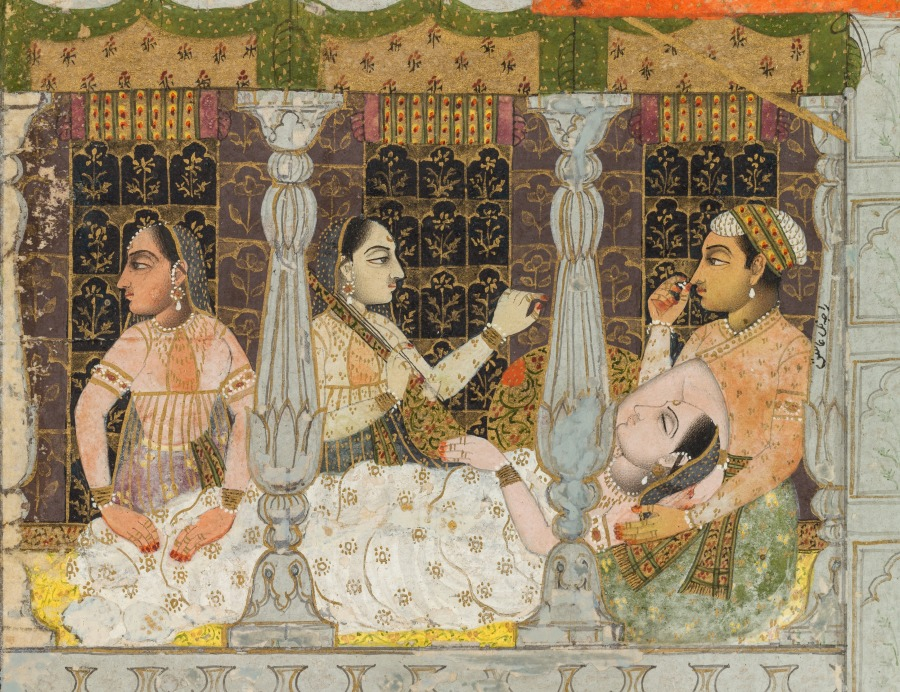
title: Lovers and beloveds: A composite of scenes from Persian, Urdu, and Sanskrit literature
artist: Chitarman II (Indian, c. 1680–с. 1750)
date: c. 1735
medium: Gum tempera and gold on paper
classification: Painting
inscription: Persian inscriptions throughout, in nasta‘liq script: Top left: The celebrated lover Ranjha; Top right, above awning: The notable ladies of the city falling into a swoon having caught sight of Joseph’s beauteous countenance; Top center, on pillar beneath canopy: The celebrated lover Vamiq; On another pillar, behind the woman’s head: The celebrated beloved ‘Azra; Upper left, on pillar: King Nala, the lover; Central figure with halo: The coming from the prison and sitting [in state] of the Lord Joseph the Prophet, with the women of the town cutting the palms of their hands and falling down unconscious; Left of center: [. . . cutting palms . . . wine cups fell from their hands . . . state of wonderment . . .]; Central pavilion at left: Sassi, the beloved the lover [Punnun]; Below central figure of Joseph: The stream of milk Shirin the beloved, weeping The death of Farhad, the lover; Lower right, in front of bearded man: Hafiz of Shiraz; Below his decanter: The stick of candy [referring to the woman with whom, according to popular lore, Hafiz was supposed to have fallen in love as a youth]; Behind the pavilion at right: Bride descending into a grave . . .; On the white railing to the left: Khwaja Bu Ali . . .; Bottom left: Queen Padmavati, the beloved, King Ratnasena, the lover; Bottom right: Majnun, the lover; On page held by Majnun: Say, “He is Allah, who is One, Allah the eternal refuge. He neither begets nor is born, Nor is there to Him any equivalent.” [Qur'an, chapter 112]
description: The figure of Joseph, identified by his halo, sits in the center near the top of this painting of heroes and heroines of ten different Persian, Urdu, and Sanskrit romances. The depicted scene occurs after Joseph has been purchased by Zulaykha in Egypt. Zulaykha, wishing to show him off to her friends and acquaintances, invites them to her home where she supplies oranges and knives. When the women see Joseph, they all are so distracted by his divine beauty that they accidentally cut their hands while peeling their oranges, but remain mesmerized by his appearance. The dramatic scene in the center is from the Persian romance of Khusrau and Shirin, in which Farhad, a stonecutter who loved Shirin, threw himself to his death from a mountaintop after hearing news of Shirin’s death, falsely sent to him from his rival Khusrau. The emaciated Majnun is in the lower right corner. Every vignette has been identified with a tiny Persian inscription.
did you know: Below the bearded poet Hafiz is the woman he loved; her name was Stick of Candy.